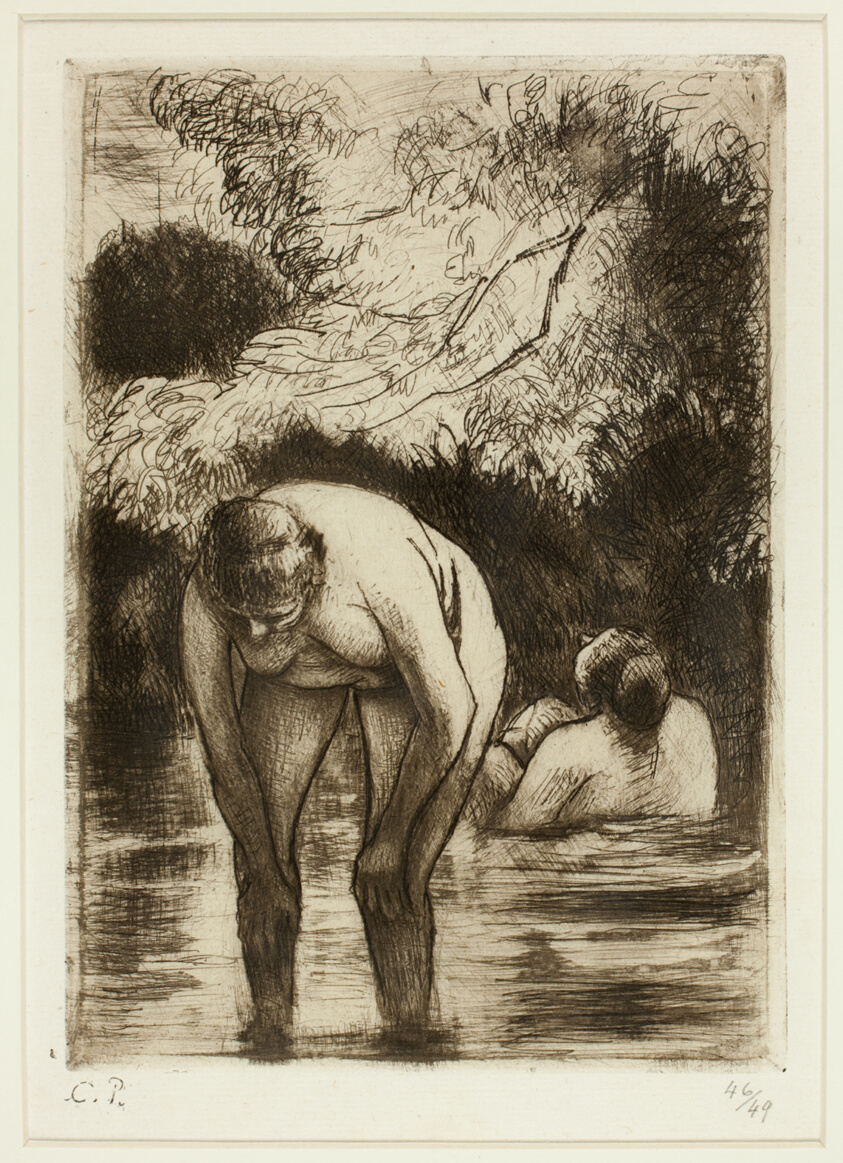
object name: Print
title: The Two Bathers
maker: Camille Pissarro (French, 1830-1903)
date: 1895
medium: Drypoint, etching, and aquatint, with burnishing, in black on ivory laid paper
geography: France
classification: drypoint; print; prints and drawing